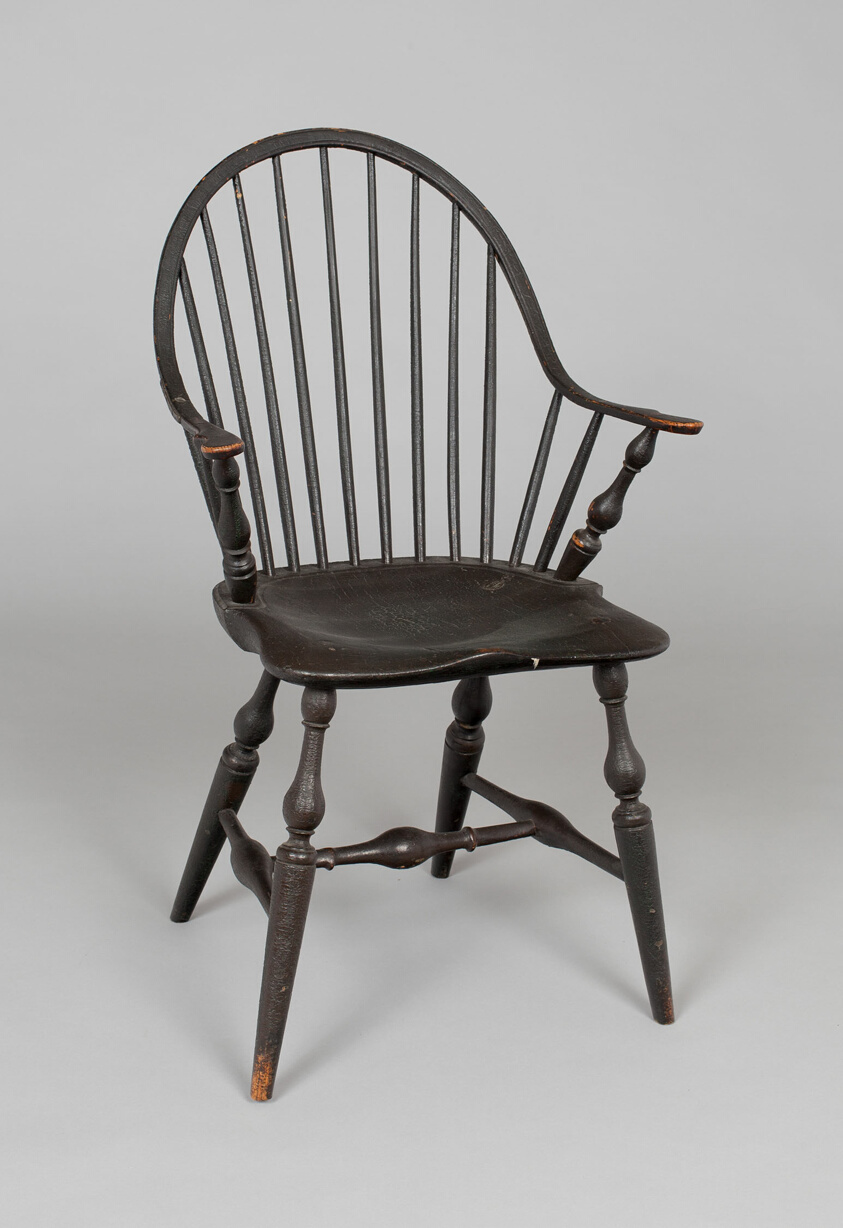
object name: Furniture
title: Windsor Armchair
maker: J.M. Hasbrouck; American, 18th Century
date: 1752–87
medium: Tulipwood, maple, oak, and ash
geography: Kingston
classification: seating; furniture; american decorative arts; american arts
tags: furniture